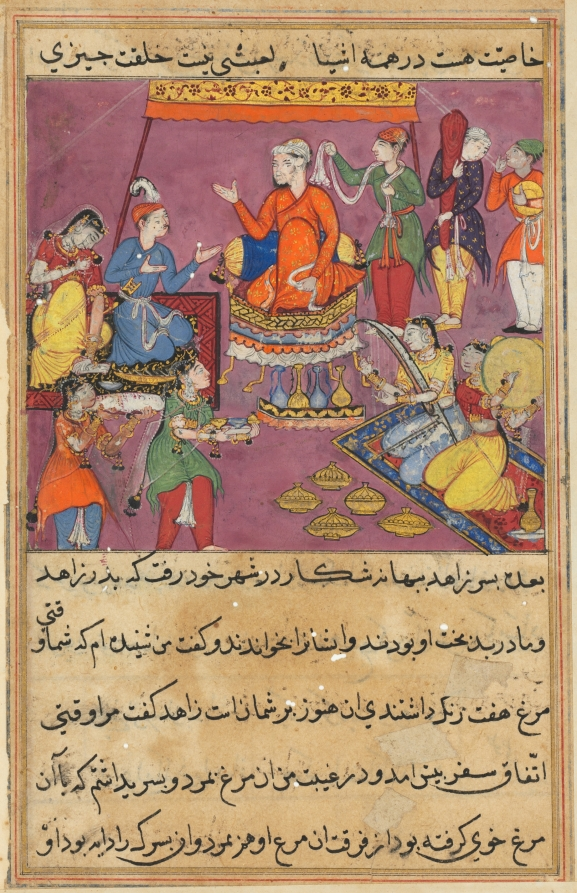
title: The king gives his daughter in marriage to the pious man’s son, from a Tuti-nama (Tales of a Parrot): Fifty-second Night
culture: Mughal India, court of Akbar (reigned 1556–1605)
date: c. 1560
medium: gum tempera, ink, and gold on paper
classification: Painting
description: The king sits on his throne at the center of his bustling court. On the right, two musicians play instruments while other servants attend to the royal celebration. The pious man’s son, seated on the left, has successfully killed the dragon that menaced the king’s lands. As a reward, he is married to the king’s daughter and named vice-regent.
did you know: The musicians play a harp and a tambourine.